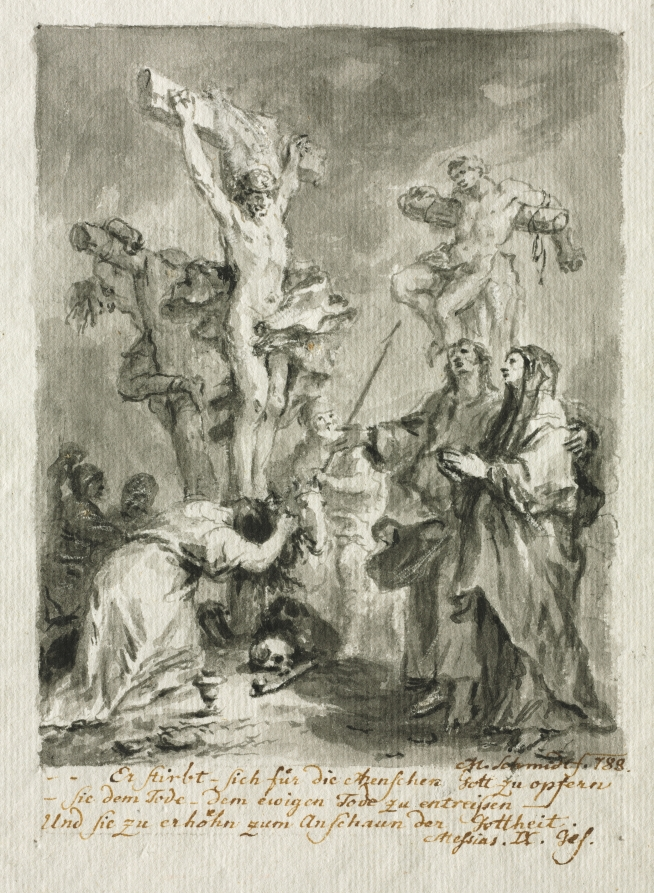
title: The Crucifixion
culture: Germany, 18th century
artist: Martin Johann Schmidt (Austrian, 1718–1801)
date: 1788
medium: brush and gray ink and gray wash with black chalk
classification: Drawing